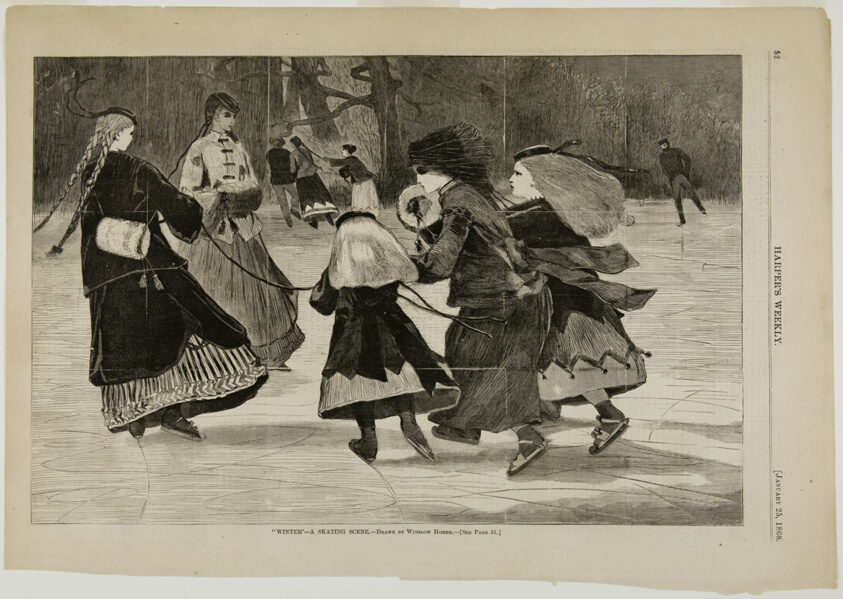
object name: Print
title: "Winter"—A Skating Scene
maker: Winslow Homer (American, 1836-1910); published by Harper's Weekly (American, 1857-1916)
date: published January 25, 1868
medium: Wood engraving on paper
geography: United States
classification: wood engraving; print; prints and drawing